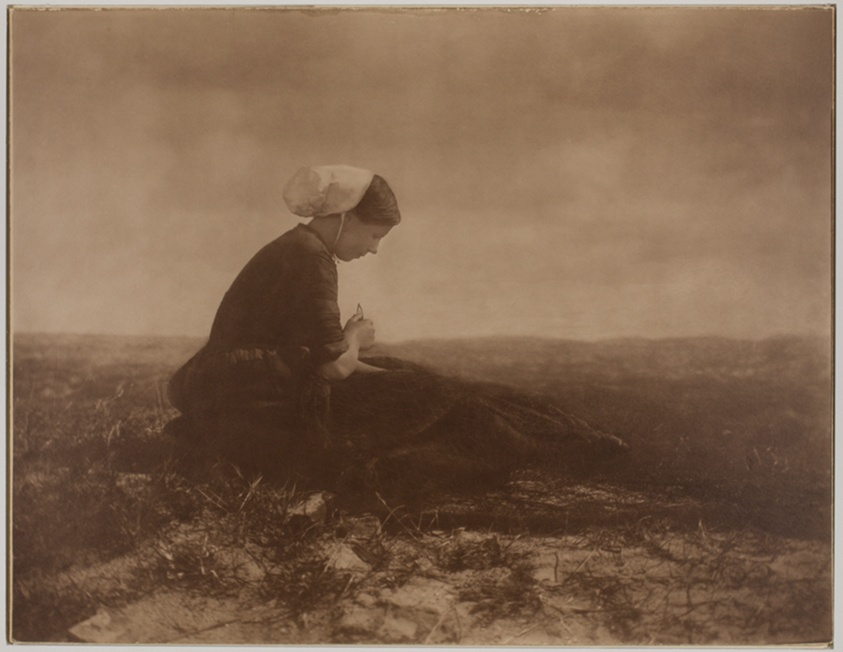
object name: Photograph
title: The Net Mender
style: Pictorialism, 19th century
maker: Alfred Stieglitz (American, 1864–1946)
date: 1894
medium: Carbon print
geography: United States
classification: carbon print; pigment process; photographic process; photography; photograph